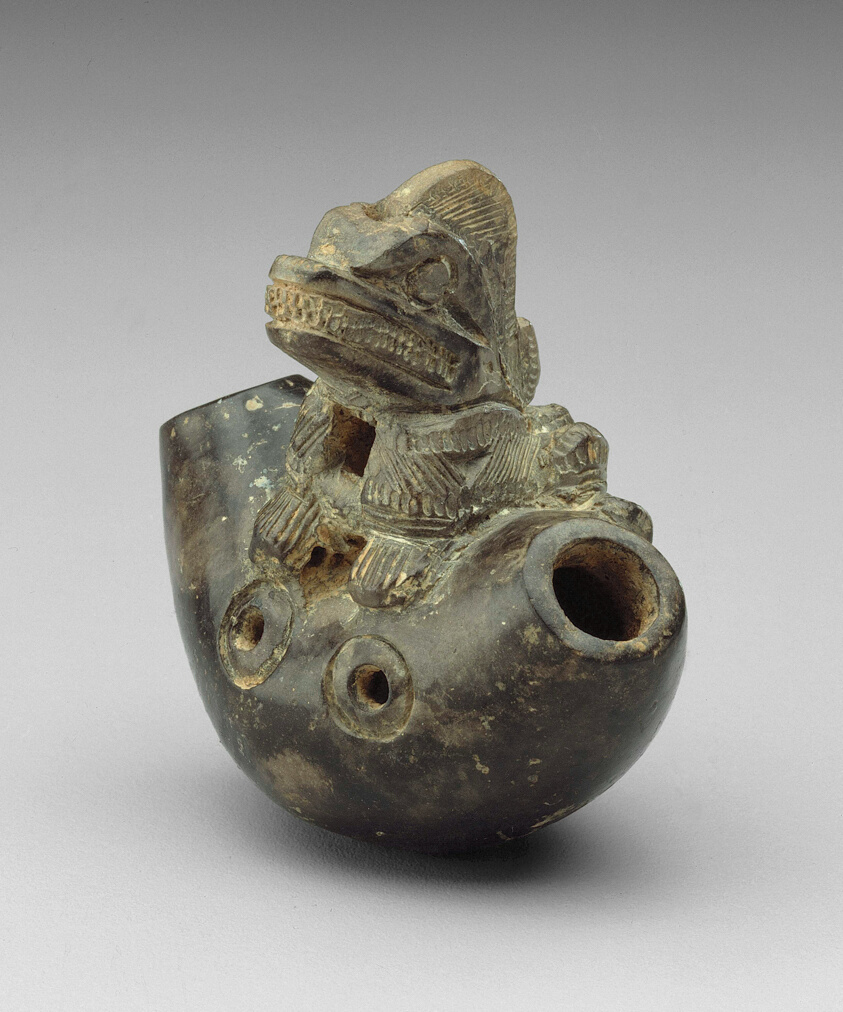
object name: Decorative Arts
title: Whistle with an Iguana or Saurian Sculpted on its Surface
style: tairona, americas, lower central america, Arts of the Americas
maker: Artist unknown (Tairona); Sierra Nevada de Santa Marta, Colombia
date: c. 1300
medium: Ceramic and pigment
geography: Colombia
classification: musical instrument; earthenware; american decorative arts; ceramics; miniature; decorative arts; art of the americas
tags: iguana, musical instruments, saurian